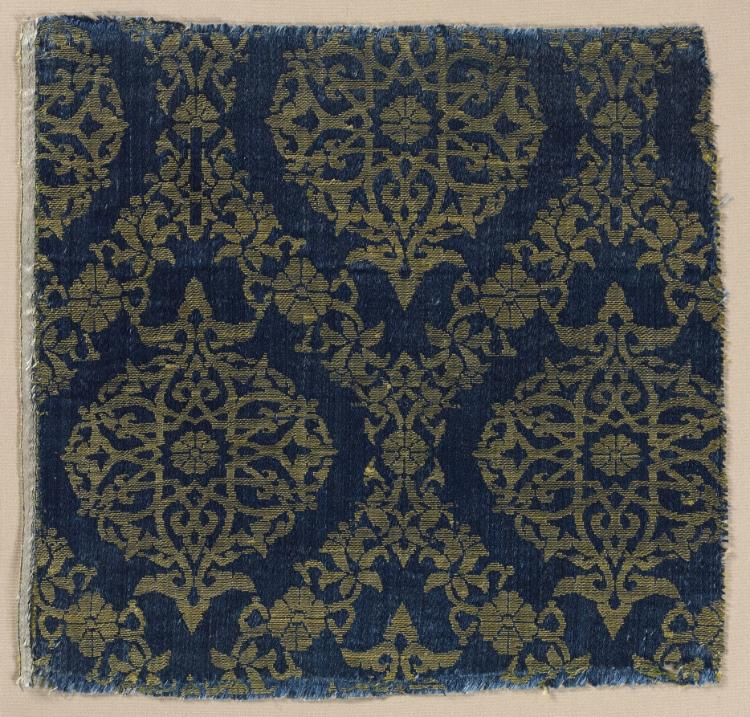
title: Lampas with foliate medallions in ogival lattice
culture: Egypt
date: 1400s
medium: lampas: silk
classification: Textile